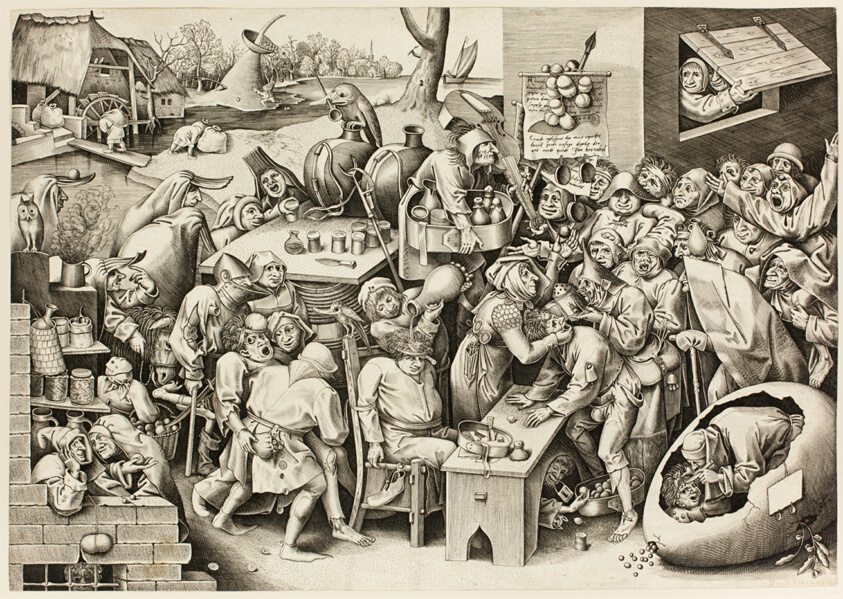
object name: Print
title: The Stone Operation or The Witch of Mallegem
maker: Pieter van der Heyden (Flemish, c. 1530–after 1584); after Pieter Bruegel, the elder (Flemish, 1525/30-1569); published by Hieronymous Cock (Flemish c. 1510–1570)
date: 1559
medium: Engraving in black on ivory laid paper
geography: Flanders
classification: engraving; paper; print; prints and drawing